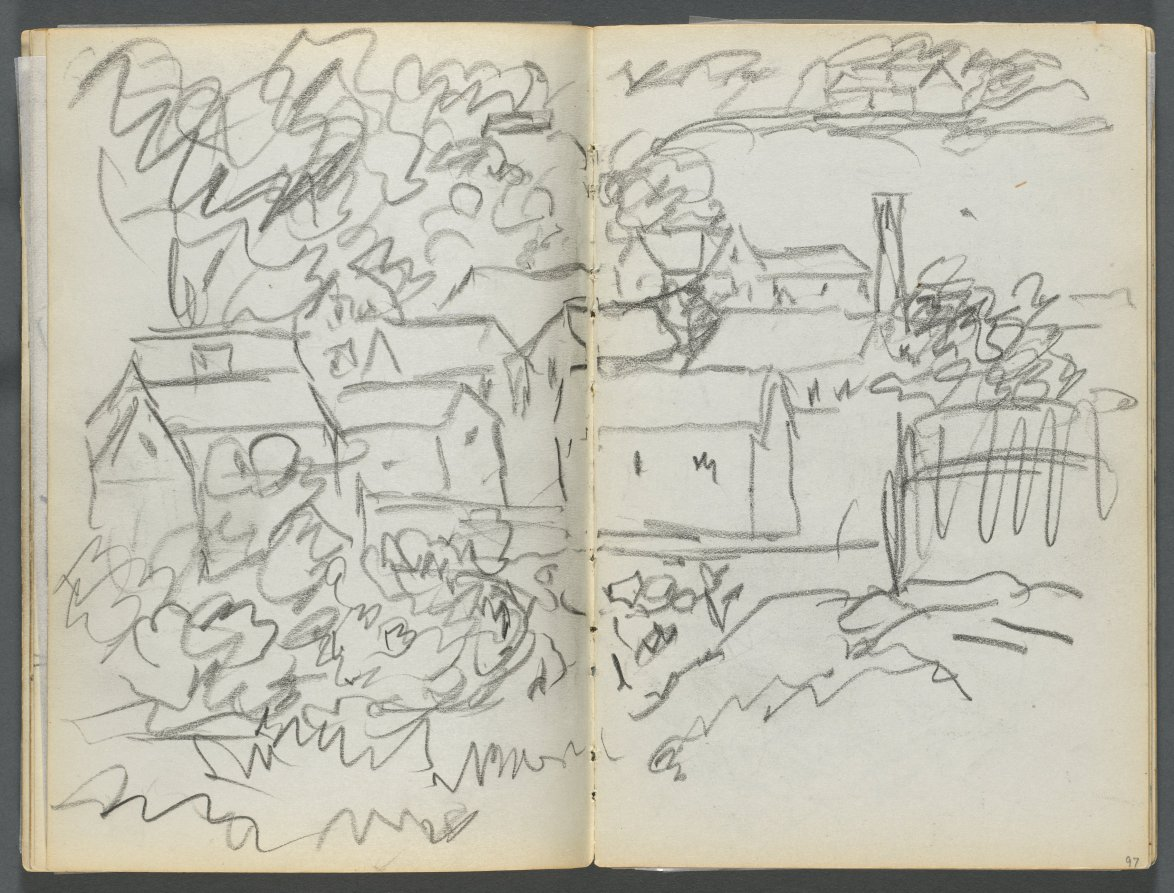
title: Sketchbook, The Dells, N° 127, page 096 & 97: Landscape with Houses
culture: America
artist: Maurice Prendergast (American, born Newfoundland [now Canada], 1858–1924)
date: c. 1919–1921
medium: graphite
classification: Bound Volume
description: This sketchbook contains 59 pages of graphite drawings and 16 watercolors made at various locations on Cape Ann, Massachusetts.